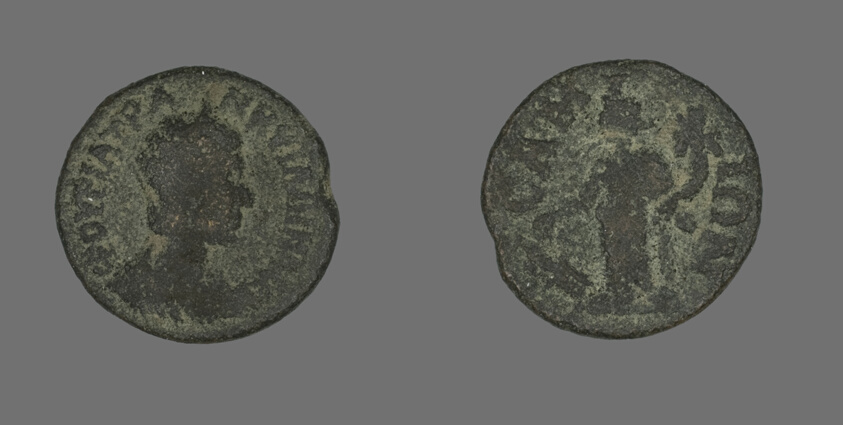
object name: Coin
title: Coin Depicting the Empress Tranquillina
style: roman (ancient, style or period)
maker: Roman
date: 238-244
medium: Bronze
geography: Ancient Greece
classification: coin; ancient art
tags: portrait